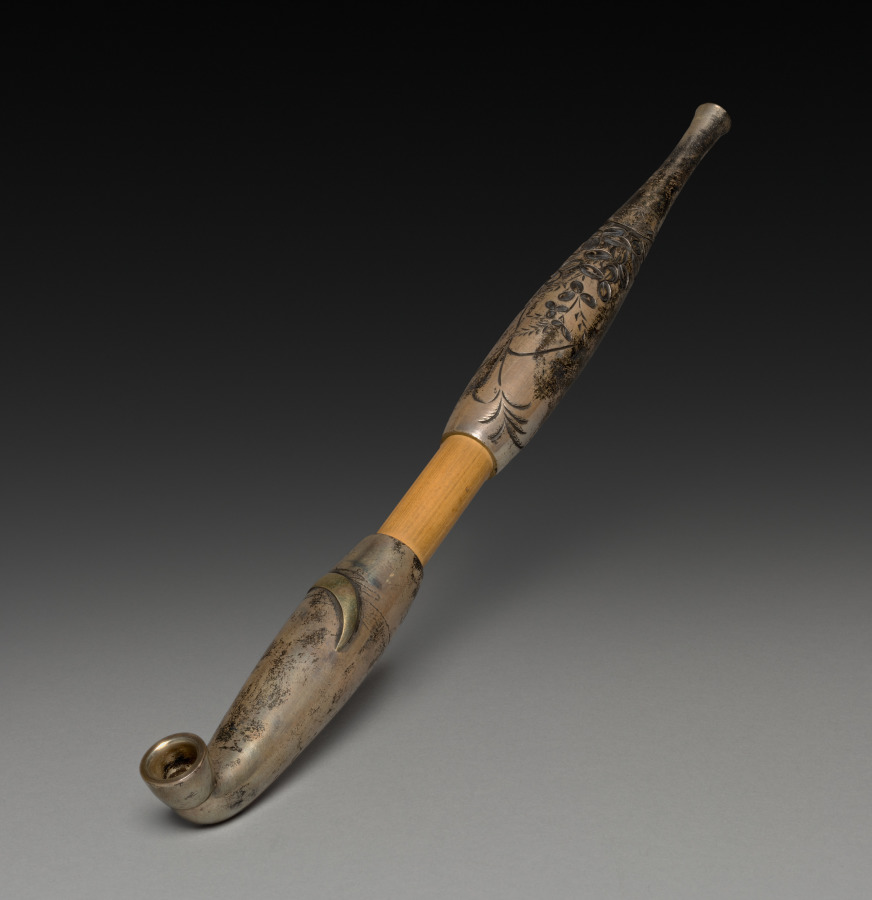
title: Tobacco Pipe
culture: Japan, Edo period (1615–1868)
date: early to mid-1800s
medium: bamboo, silver, and brass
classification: Miscellaneous